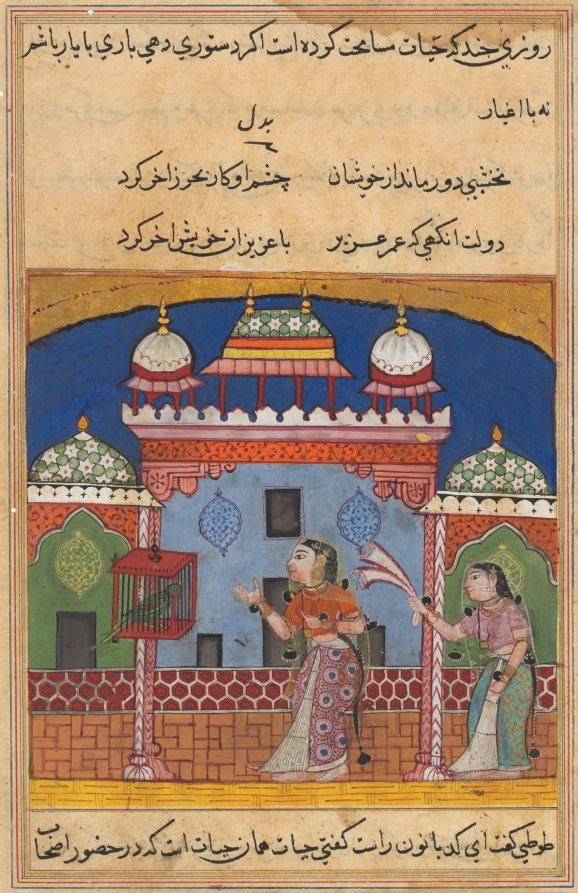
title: The Parrot Addresses Khujasta at the Beginning of the Twenty-second Night, from a Tuti-nama (Tales of a Parrot)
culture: Mughal India, court of Akbar (reigned 1556–1605)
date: c. 1560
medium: gum tempera, ink, and gold on paper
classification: Painting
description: On the 22nd night after her husband’s departure, the parrot advises his mistress Kujastha that when she meets her lover that night she should use her best judgment and manners and not allow herself to be laughed at like the wife of the amir, a local ruler. When Khujasta asked about what happened to her, the parrot related a story about the amir, his jester, and their unfaithful wives. This artist continued to use flat planes of colors and patterns characteristic of Indian painting before the Mughals. Experimentation with techniques to indicate depth and spatial recession––a new trend early in the reign of Akbar––can be seen in the tilted planes of the birdcage and the shading at the edges of the doorways.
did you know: The parrot’s story is set in Kerman, a province of southeast Iran.